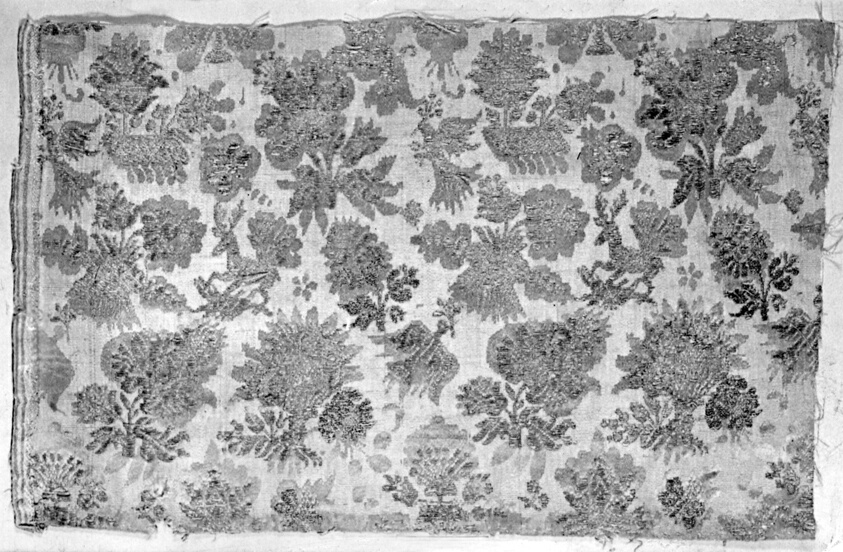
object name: Textile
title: Fragment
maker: Spain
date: Late 17th century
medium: Brocaded fancy simple satin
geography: Spain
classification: textile; weaving